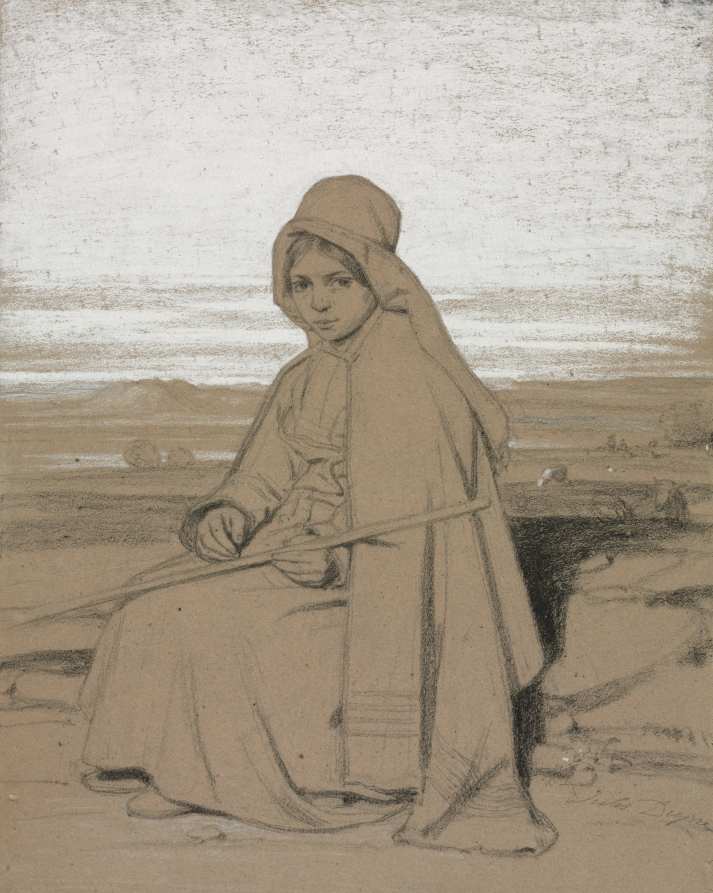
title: A Seated Shepherdess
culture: France, 19th century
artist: Jules Dupré (French, 1811–1889)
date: c. 1836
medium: black chalk with white heightening and white pastel on brown paper laid down on board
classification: Drawing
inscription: Signed, lower right, in black chalk: Jules Dupre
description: Unique for Jules Dupré, who mostly recorded landscapes, this sheet features a woman holding a crook for herding sheep. Many middle-class collectors at the time were eager for images of rural life while cities grew and factories proliferated. Cleveland’s drawing forms a pair with a similar depiction of a male shepherd, also created using wetted and burnished white pastel on earthy brown paper. It is one of numerous objects in these galleries formerly owned by Clevelander Muriel Butkin, a passionate scholar and collector of French art from the 1800s who bequeathed nearly 300 drawings to the museum.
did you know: Dupré was known for his evocative skies reflecting different atmospheric conditions.